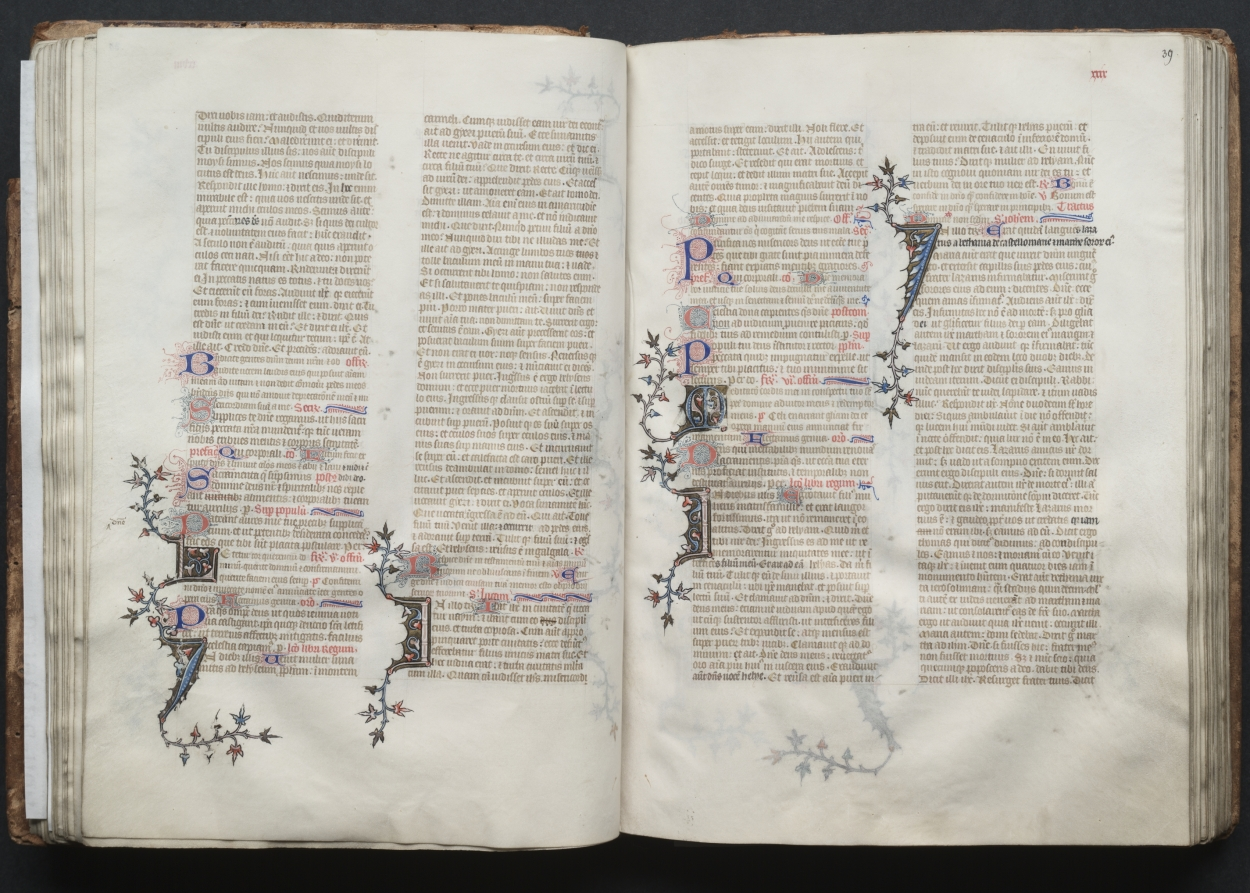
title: The Gotha Missal: Fol. 39r, Text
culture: France, Paris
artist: Master of the Boqueteaux (French)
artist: and Workshop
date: c. 1375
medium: ink, tempera, and gold on vellum; blind-tooled leather binding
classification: Bound Volume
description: The style and quality of this manuscript's decoration is typical of deluxe Parisian books made for aristocratic or royal patrons. Most of the book's decoration appears to be the work of the Master of the Boqueteaux, an artist active at the court of King Charles V (died 1380). His style was apparently shared by a number of book illuminators working in and around Paris. It is very possible that the Gotha Missal belonged to Charles V, but is not provable because the manuscript has no royal portraits and lacks a colophon. Given the book's magnificent decoration, however, it would seem that it was produced for a Valois prince, if not for the king himself. The manuscript receives its name from the German dukes of Gotha, its later owners.